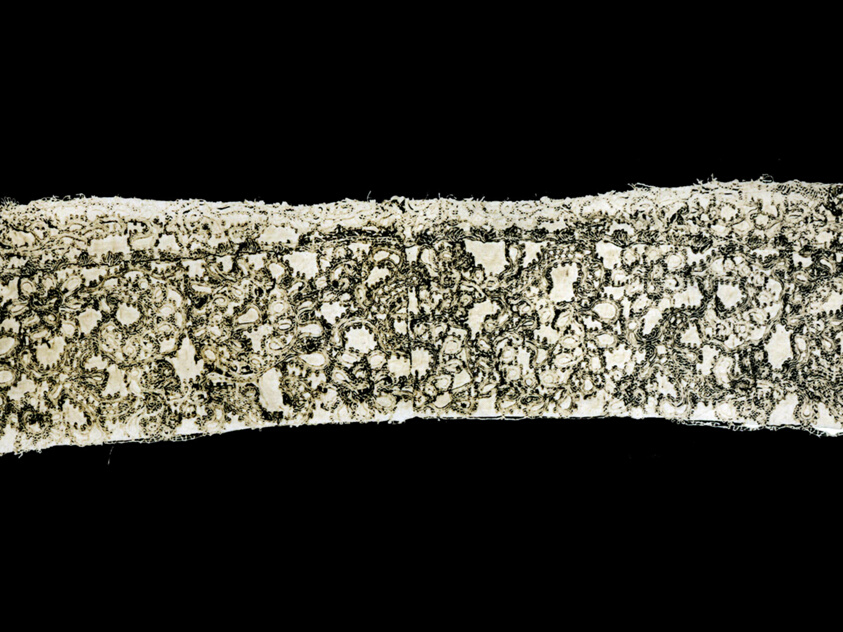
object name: Textile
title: Fragment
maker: Probably England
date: 1650/75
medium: Silk and silk-wrapped linen, bobbin straight lace of a type known as "Gimp"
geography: England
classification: textile; lace - bobbin